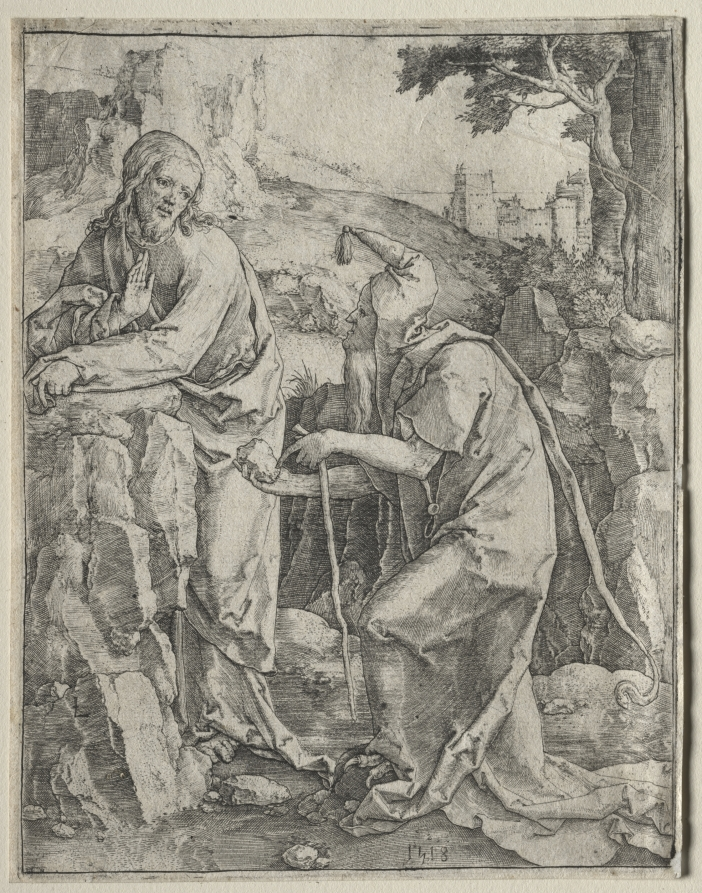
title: The Temptation of Christ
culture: Netherlands, 16th century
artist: Lucas van Leyden (Netherlandish, 1494–about 1533)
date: 1518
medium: engraving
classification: Print